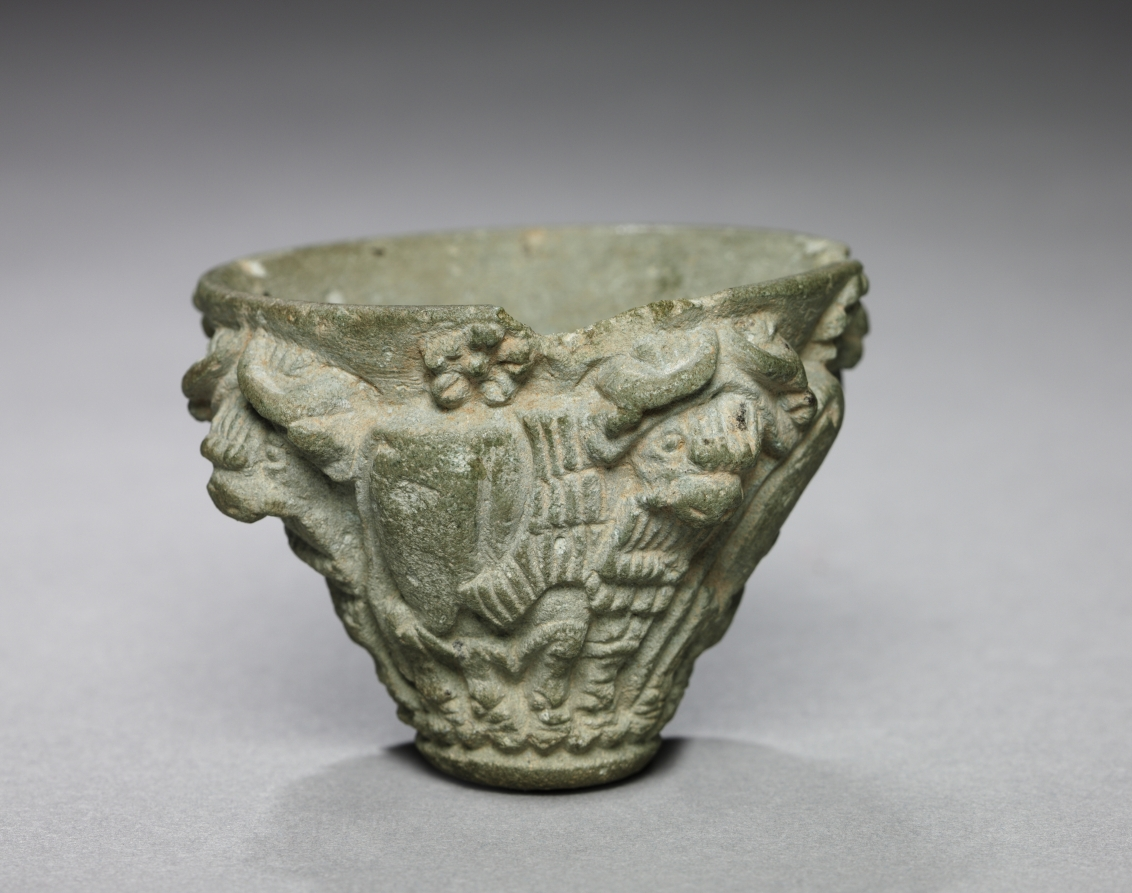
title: Bull Procession Cup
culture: Sumerian, Iraq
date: c. 3100–2900 BCE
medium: gray limestone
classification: Sculpture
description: It was believed that the person who drank from a cup like this magically gained the fertility of the bulls carved on its surface.